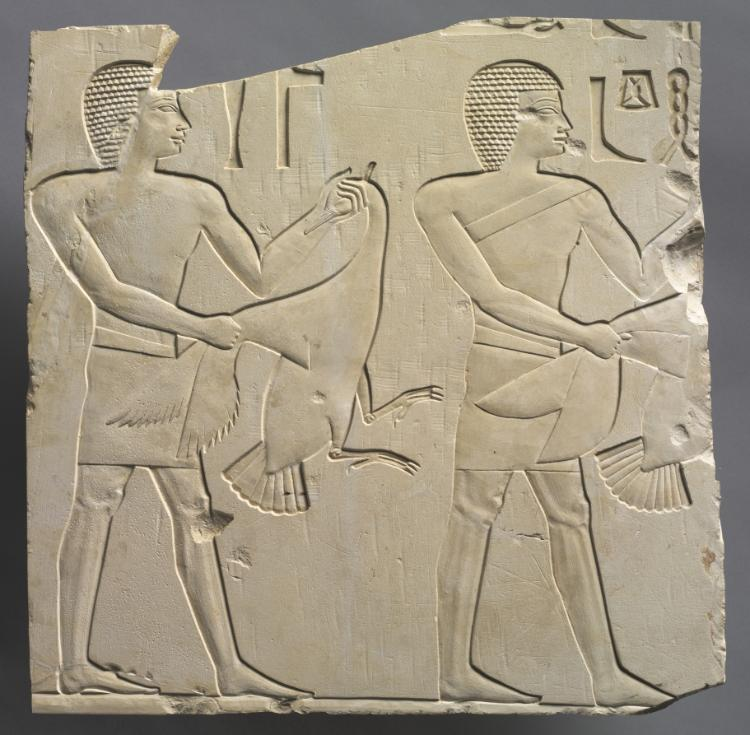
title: Prophet and Lector-Priest with Offerings of Live Geese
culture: Egypt, Thebes, Late period (715–332 BCE), Dynasty 26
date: c. 667–647 BCE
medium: limestone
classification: Sculpture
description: Two priests of different rank bring offerings of live geese to be ritually killed for the tomb occupant. This is in sunken relief in the style of the later Old Kingdom.